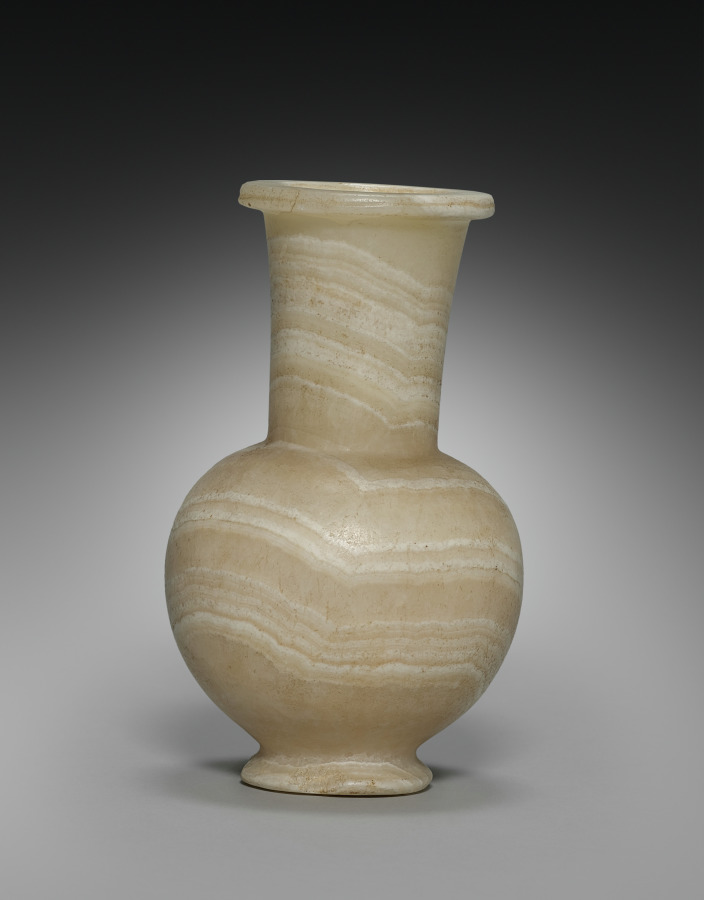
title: Long-Necked Flask with Lid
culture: Egypt, New Kingdom (1540–1069 BCE), Dynasty 18, reign of Tuthmosis III (1479–1425 BCE)–reign of Amenhotep III (1390–1352 BCE)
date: 1401–1353 BCE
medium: travertine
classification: Vessels